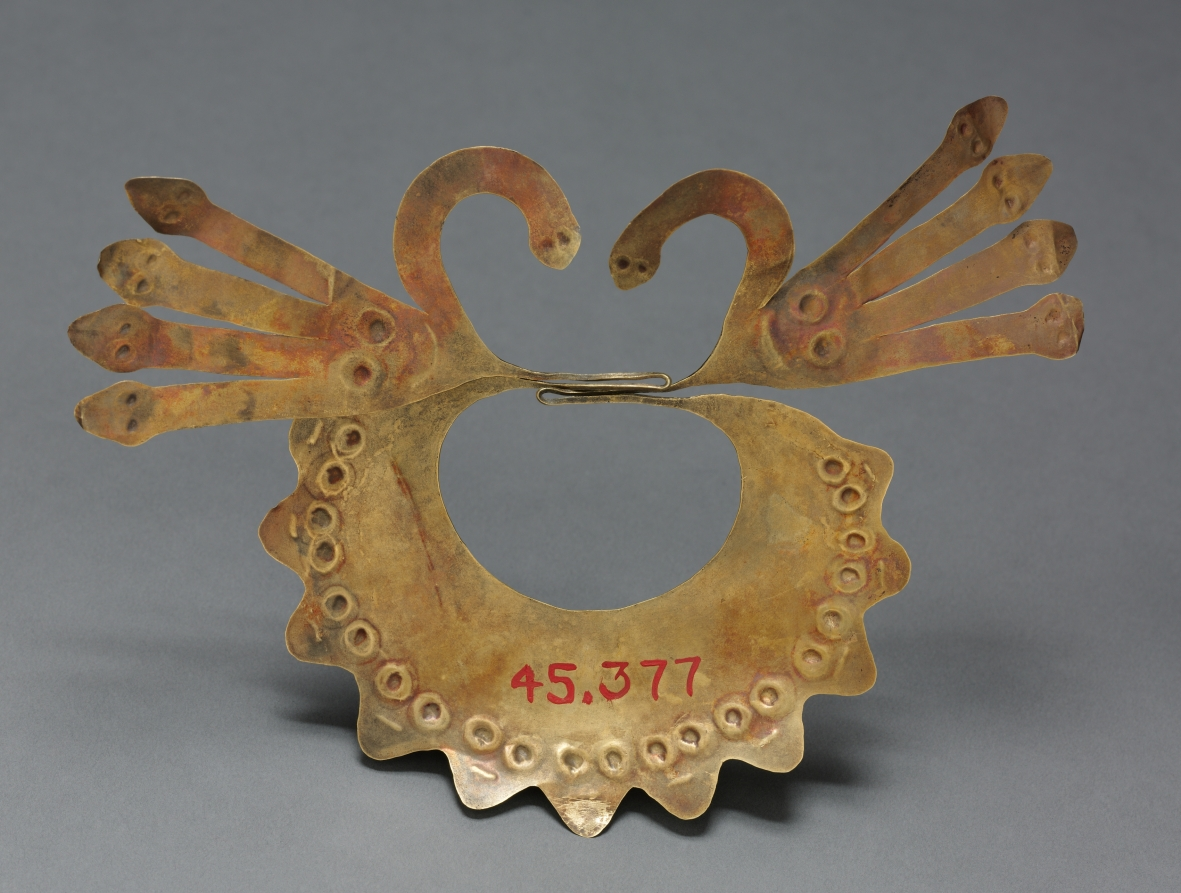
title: Mouth Mask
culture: Peru, South Coast, Nasca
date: 100 BCE–700 CE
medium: hammered gold alloy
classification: Metalwork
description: Nasca figures, like one on a bowl nearby, are shown wearing such forehead ornaments and mouth masks similar to these. The mouth mask hung from the nasal septum, the oval opening surrounding the mouth and the bristles positioned as feline whiskers, here transformed to serpents. Both were cut from sheet gold; details were worked freehand while the sheet rested on a soft surface.